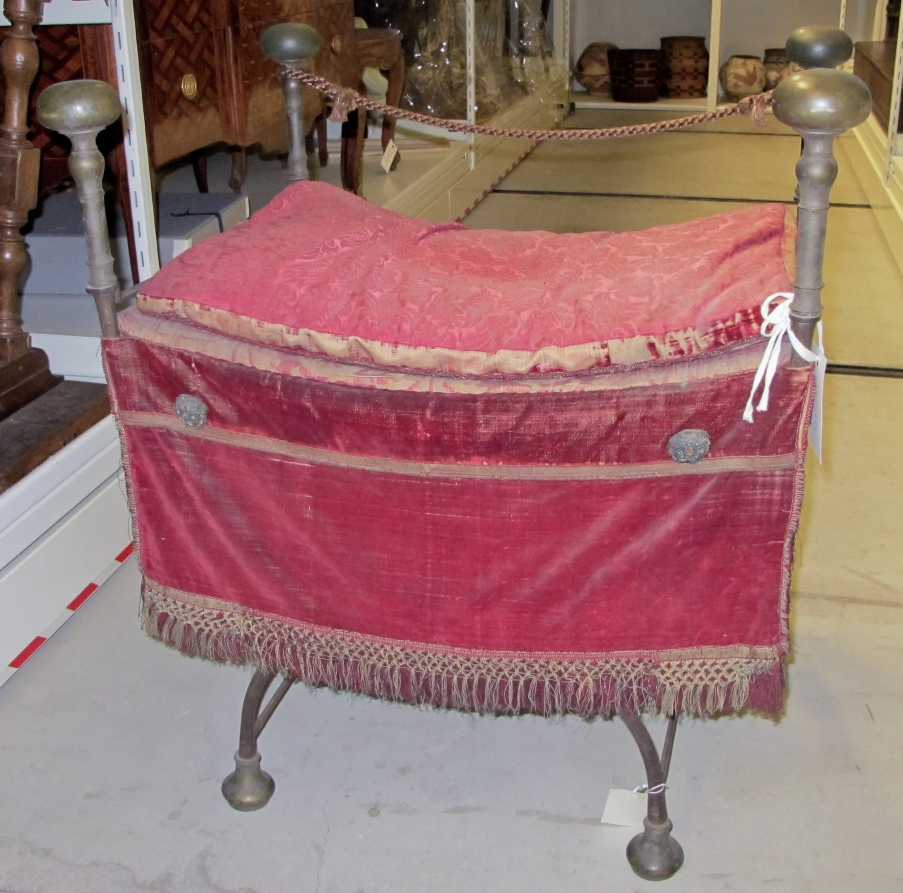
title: Ecclesiastical Faldstool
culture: Italy, 15th-16th century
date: 1400s-1500s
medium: brass and iron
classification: Furniture and woodwork